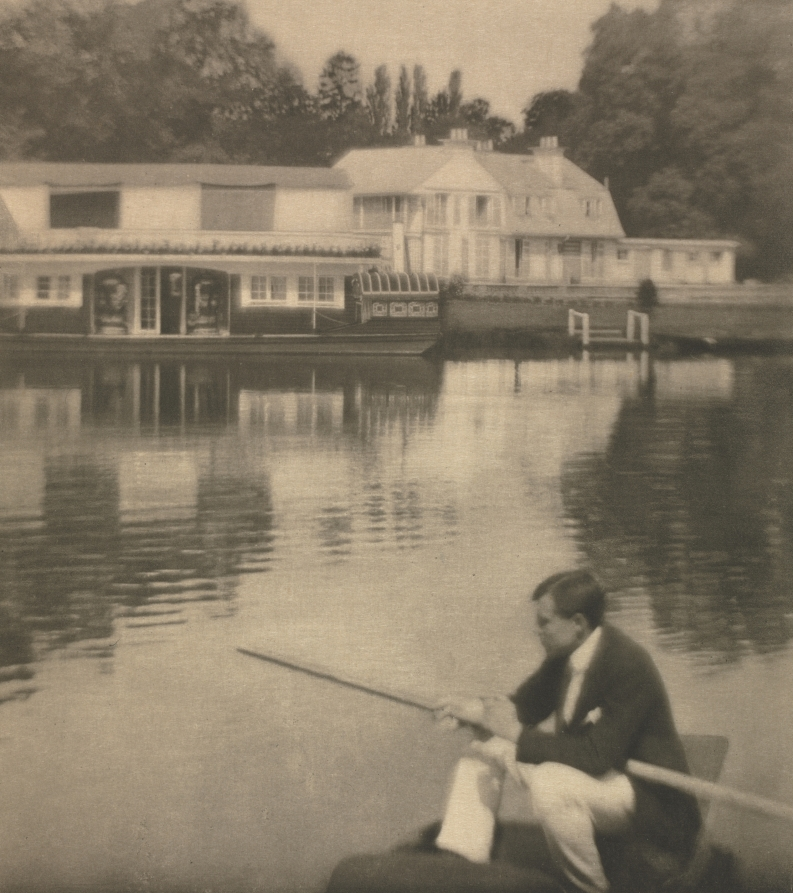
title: Camera Work: The White House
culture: England, 20th century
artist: J. Craig Annan (British, 1864–1946)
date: 1910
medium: photogravure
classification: Bound Volume